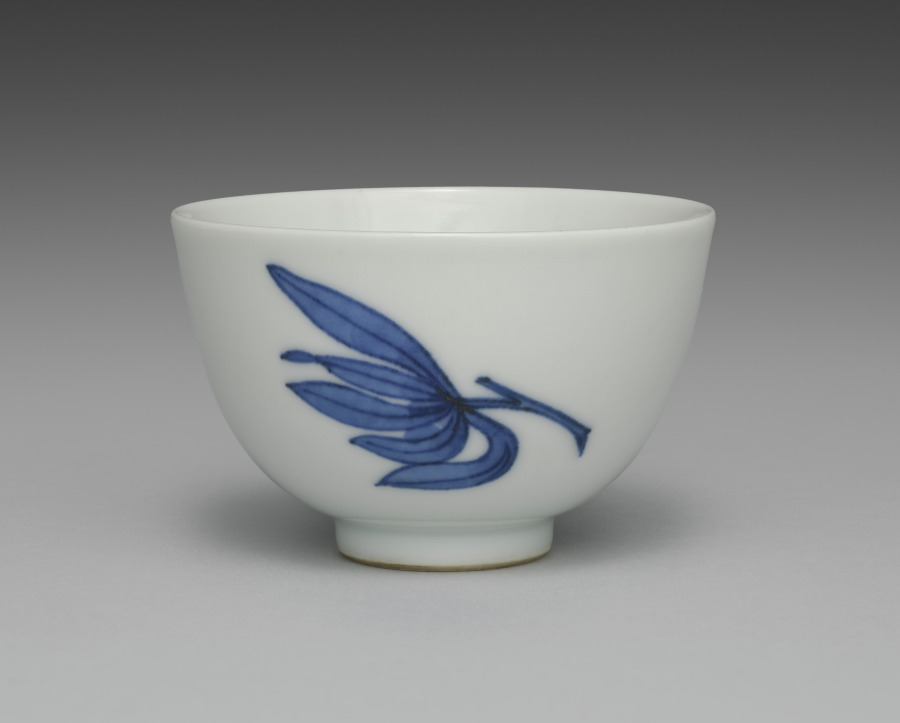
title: Teacup from Tea Set with Orchids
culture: Japan, Meiji period (1868–1912)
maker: Seifū Yohei III (Japanese, 1851–1914)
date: c. 1893–1914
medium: Porcelain with underglaze blue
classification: Ceramic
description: Although the teapot here is stored in a separate box from the five cups, these six pieces may once have been part of a tea set that included other tools such as a water cooler. The teacups have orchid flowers on both sides in underglaze blue, as well as a blue band inside the footring. The teapot has the same design and a blue band painted around the bottom of the lid’s knob. The cups’ long wood storage box is stamped on the exterior, over the lid and base, with a small red seal reading “Satō.” The same seal appears on five small squares of yellow textile, one placed in the bottom of each compartment in the teacup storage box. These are additional to the customary yellow cloths stamped with a “Seifu” seal. Interestingly, four of the Seifū cloths are stamped with an ovoid seal, while the remaining cloth, which is a slightly lighter color, has an unusual seal that is not quite gourd-shaped and with the fū of Seifū in a stylized, unrecognizable form. The teapot has its own box with a Satō seal and is wrapped with an orange textile stamped with the same unusual Seifū seal. A set with a very similar surface design is in the Brooklyn Museum. The Brooklyn set has a water cooler and a small pitcher, in addition to the teapot and cups, and all are in a single storage box. This box records the tea tools as made with kanpakuji, or “bright-jewel white porcelain,” counted among Yohei III’s most important inventions, and carved images. In fact, both sets have a white surface much closer in coloration to the cool white of porcelain clay used in Kyoto at the time, and the designs are simply painted. The Brooklyn set was thus likely mismatched at some point with a box intended for another tea set. Nonetheless, the box may have helped prevent the set’s original components from being dispersed, and the set itself provides insight into how the other tools from the present set may have looked.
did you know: This tea set with orchids has a side-handled pot called a kyūsu, used for steeping, straining, and serving tea.